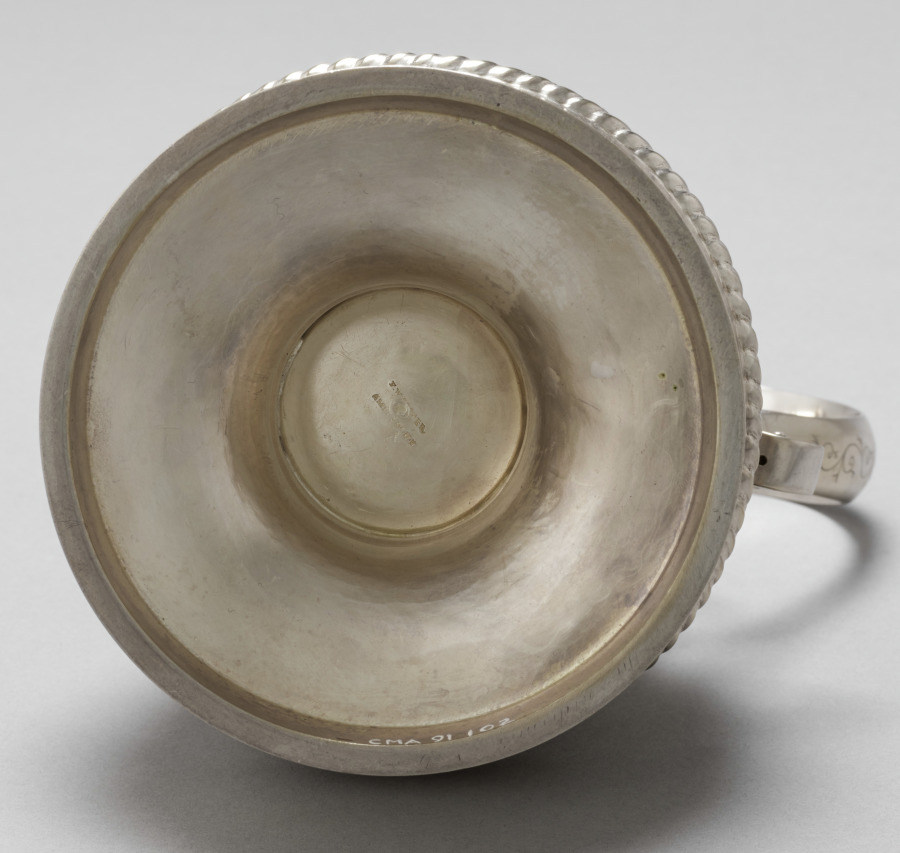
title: Flagon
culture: America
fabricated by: Francis W. Cooper (American)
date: c. 1853–1855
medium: silver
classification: Silver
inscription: engraved inscription around waist: "ON EARTH PEACE GOOD WILL TOWARDS MEN."